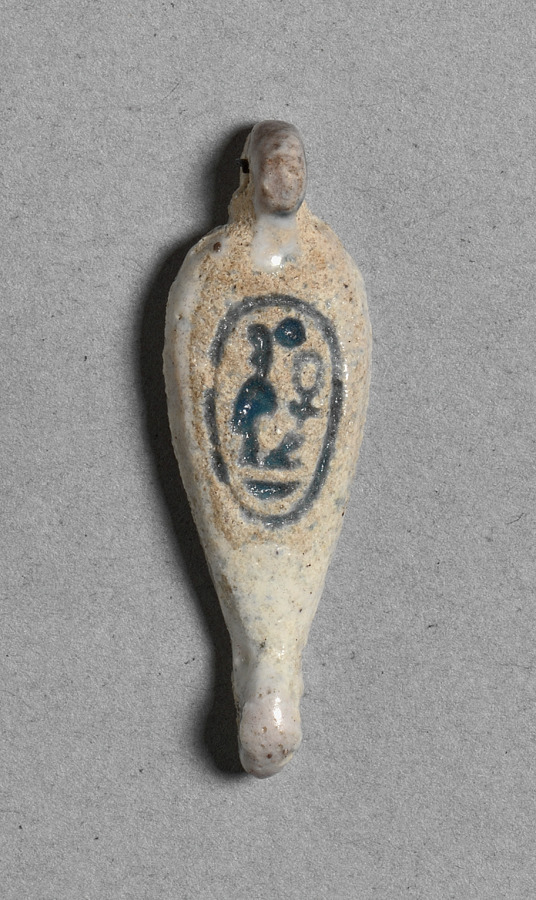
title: Petal-Shaped Bead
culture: Egypt, New Kingdom (1540–1069 BCE), Dynasty 18, reign of Amenhotep III (1390–1352 BCE)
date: c. 1391–1353 BCE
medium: faience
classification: Jewelry